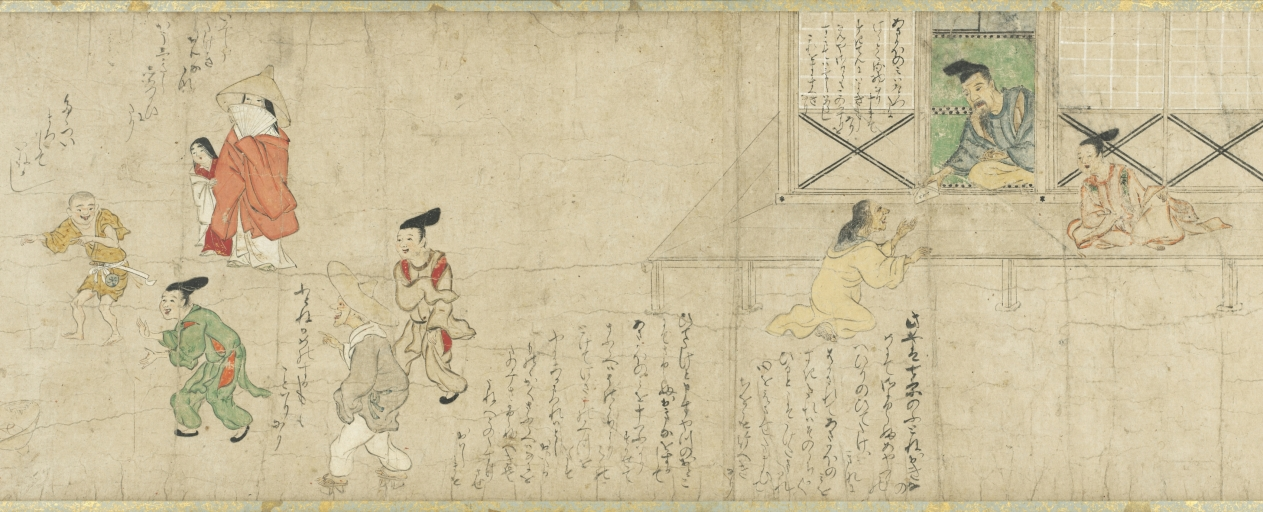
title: The Story of Fukutomi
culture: Japan, Muromachi period (1392–1573)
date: mid-1400s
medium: Handscroll; ink and color on paper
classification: Painting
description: This handscroll shows the second half of an odd tale in which a ne’er-do-well seeks the path to quick fortune and learns the art of musical flatulence. Prior to a major performance, a mentor (and competitor) advises him to consume morning glory seeds, a laxative. Thus, while performing he fouls himself and ends his days in humiliation. The audacious nature of this story and its presentation—well-animated figures with dialogue adjacent to the appropriate moments of action—create a primitive graphic novel. Japanese visual humor about farting preceded this story, but the satirical, mean-spirited twist in this tale suggests its intent was not merely to be humorous. The story was likely commissioned by court officials who disapproved of common performers rising to high positions, outflanking what was the accepted social order.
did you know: This scroll is treasured as the second oldest surviving version of this story.